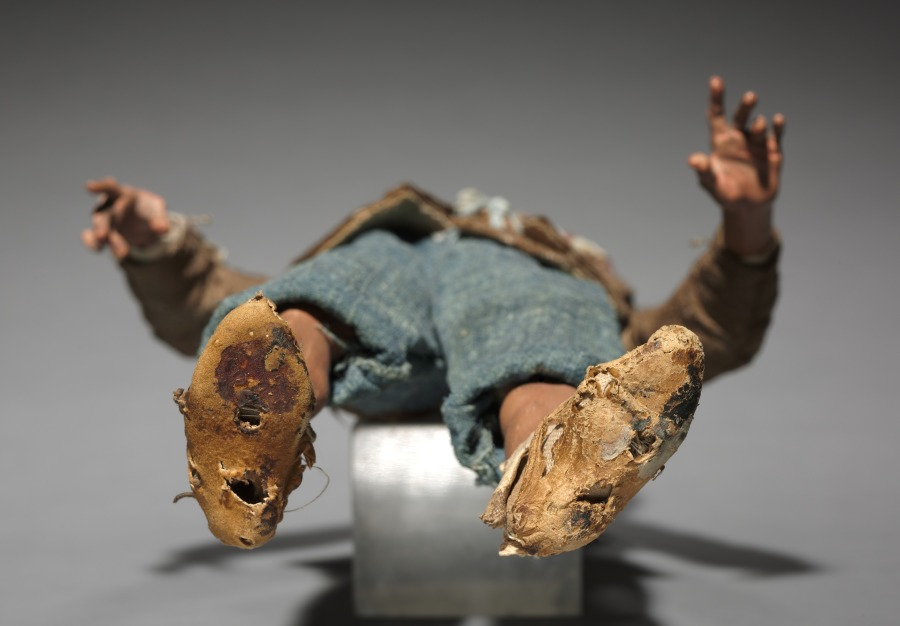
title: Figure from a Crèche: Shepherd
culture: Italy, Naples, late 18th-early 19th century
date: 1780–1830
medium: painted wood and terracotta with various textiles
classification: Sculpture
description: The practice of creating scenes of the Nativity for the home dates from the early 1700s in Italy, where people began to set up doll-like figures of about a foot or less in height. The custom was particularly popular in Naples around 1800, where crèche scenes (crèche means cradle, or crib) included many figures, whose heads and hands of painted terracotta, stuffed cloth bodies, and clothing adapted from contemporary local costumes gave them an amazingly realistic character. Representations of the birth of Jesus can be traced to the first few centuries of Christianity. Both living creatures and sculptural depictions of them were used from early times. By the late middle ages it was customary to create life-size figures of wood or stone, naturalistically painted, to represent the characters who participated in the events of Jesus's early life. These sculptures were then arranged in scenes illustrating one or both of the most important of these events, the Adoration of the Shepherds and the Adoration of the Magi-the three kings from the East who came to pay homage to the Christ child. Used in churches, these large figures were especially popular in Italy, Central Europe, Spain, and Portugal.